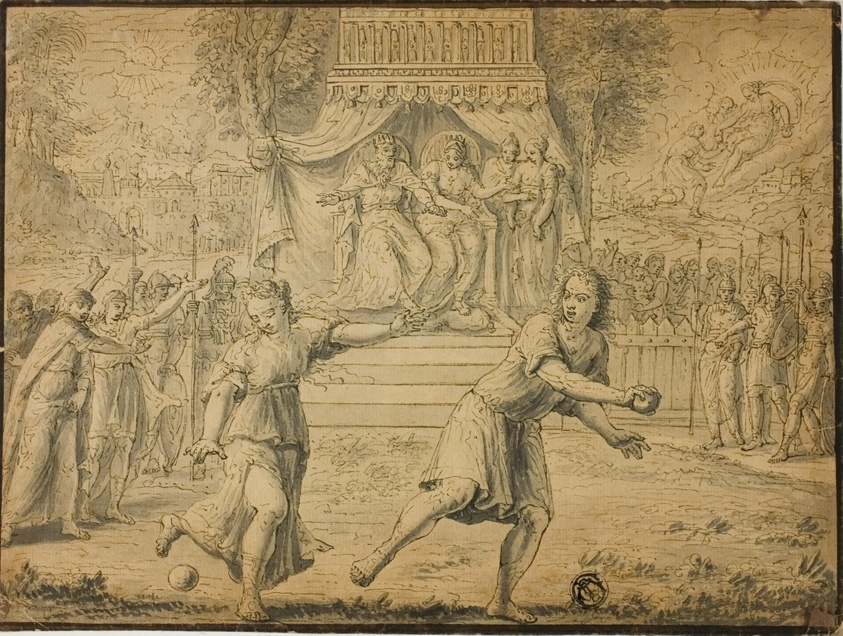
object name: Drawing and Watercolor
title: Atlanta Racing Hippomenes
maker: Possibly after Marten de Vos (Flemish, 1532-1603); or François Boitard (French, c. 1670-c. 1715); or Philibert Benoît Delarue (French, 1718-1780)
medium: Pen and black ink, with brush and gray wash, on tan laid paper, laid down on fabric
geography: Flanders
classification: pen and ink drawings; drawings (visual works); prints and drawing